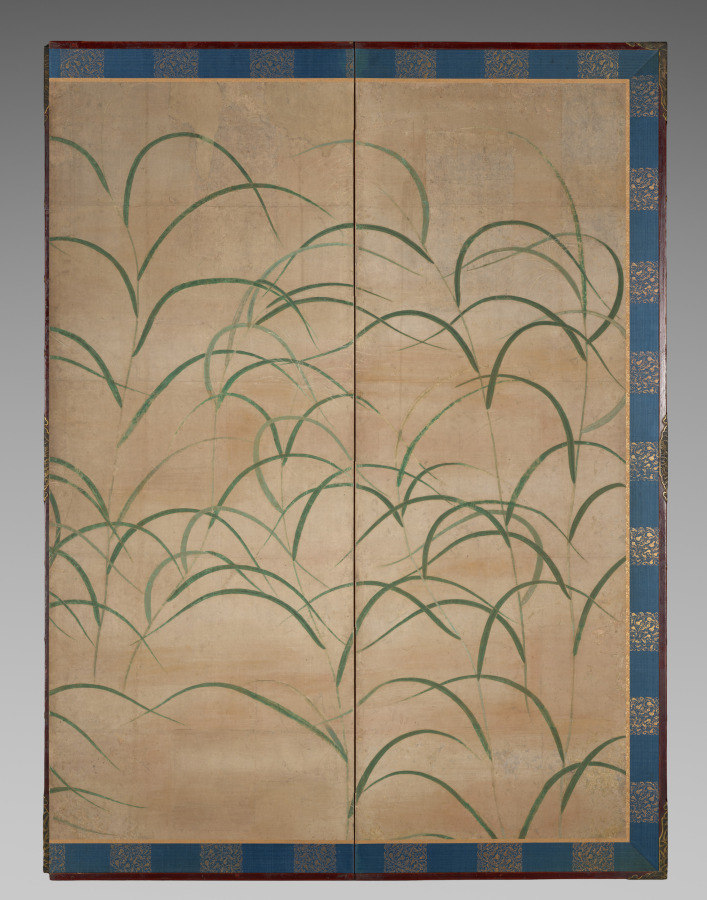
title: Susuki Grass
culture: Japan, Muromachi period (1392–1573)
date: c. 1525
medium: One of a pair of six-panel folding screens; ink, color, and gold on paper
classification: Painting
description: Susuki grass has a seasonal association with autumn in the Japanese visual and literary tradition. It is one of the “Seven Flowers of Autumn,” along with bush clover, arrowroot, pink, patrinia, mistflower, and bellflower. This composition immerses the beholder in a field of grasses and golden bands of mist. The design may have served as a backdrop for poems brushed in ink on decorated papers and attached to the surface of the screens, a practice with a long tradition in Japan.